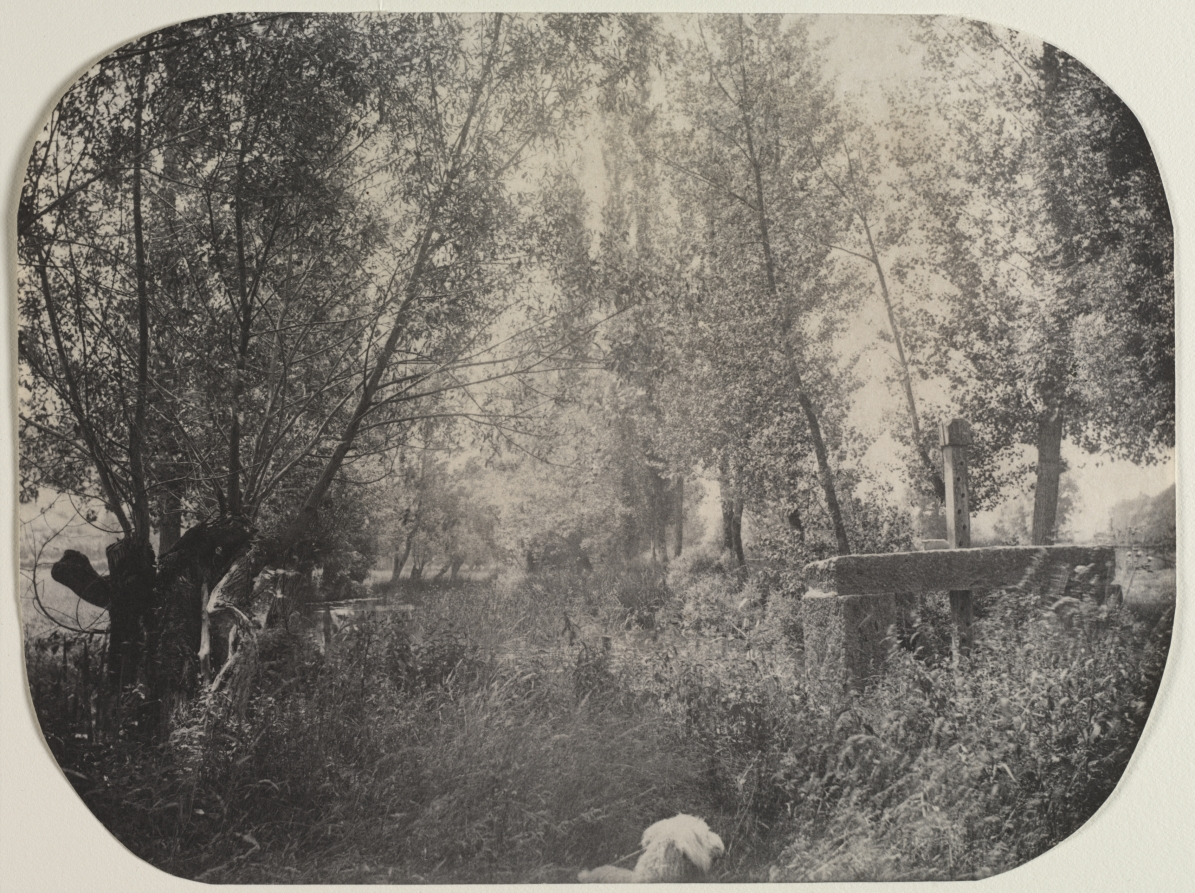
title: Untitled (Landscape with Dog)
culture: France, 20th century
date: c. 1910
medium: platinum print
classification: Photograph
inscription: Written in pencil on verso: "I 1091"